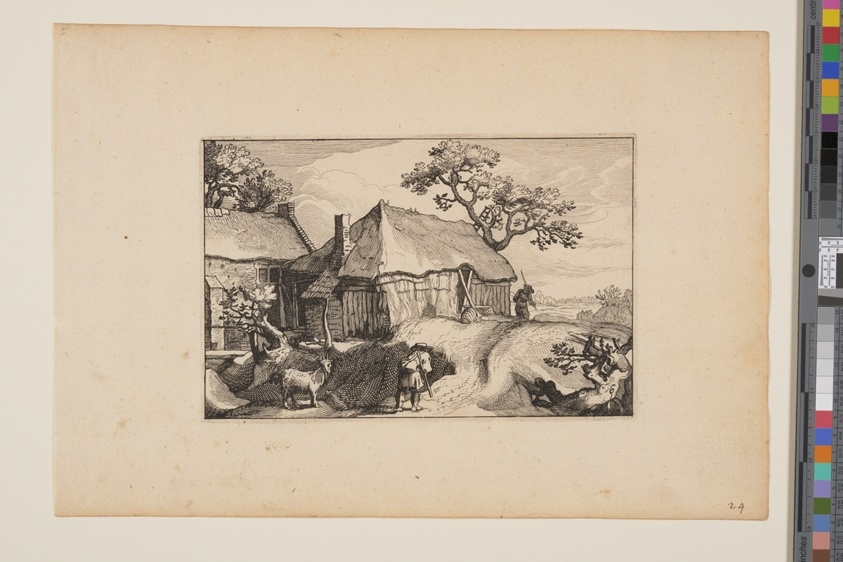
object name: Print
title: Path Along a Barn, from Landscapes (Verscheyden aerdige Lanthuysen...)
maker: Claes Jansz. Visscher (Netherlandish, c. 1550–c. 1612); after Abraham Bloemaert (Dutch, 1566–1651)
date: 1620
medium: Etching on ivory laid paper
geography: Netherlands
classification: print; paper; prints and drawing; etching